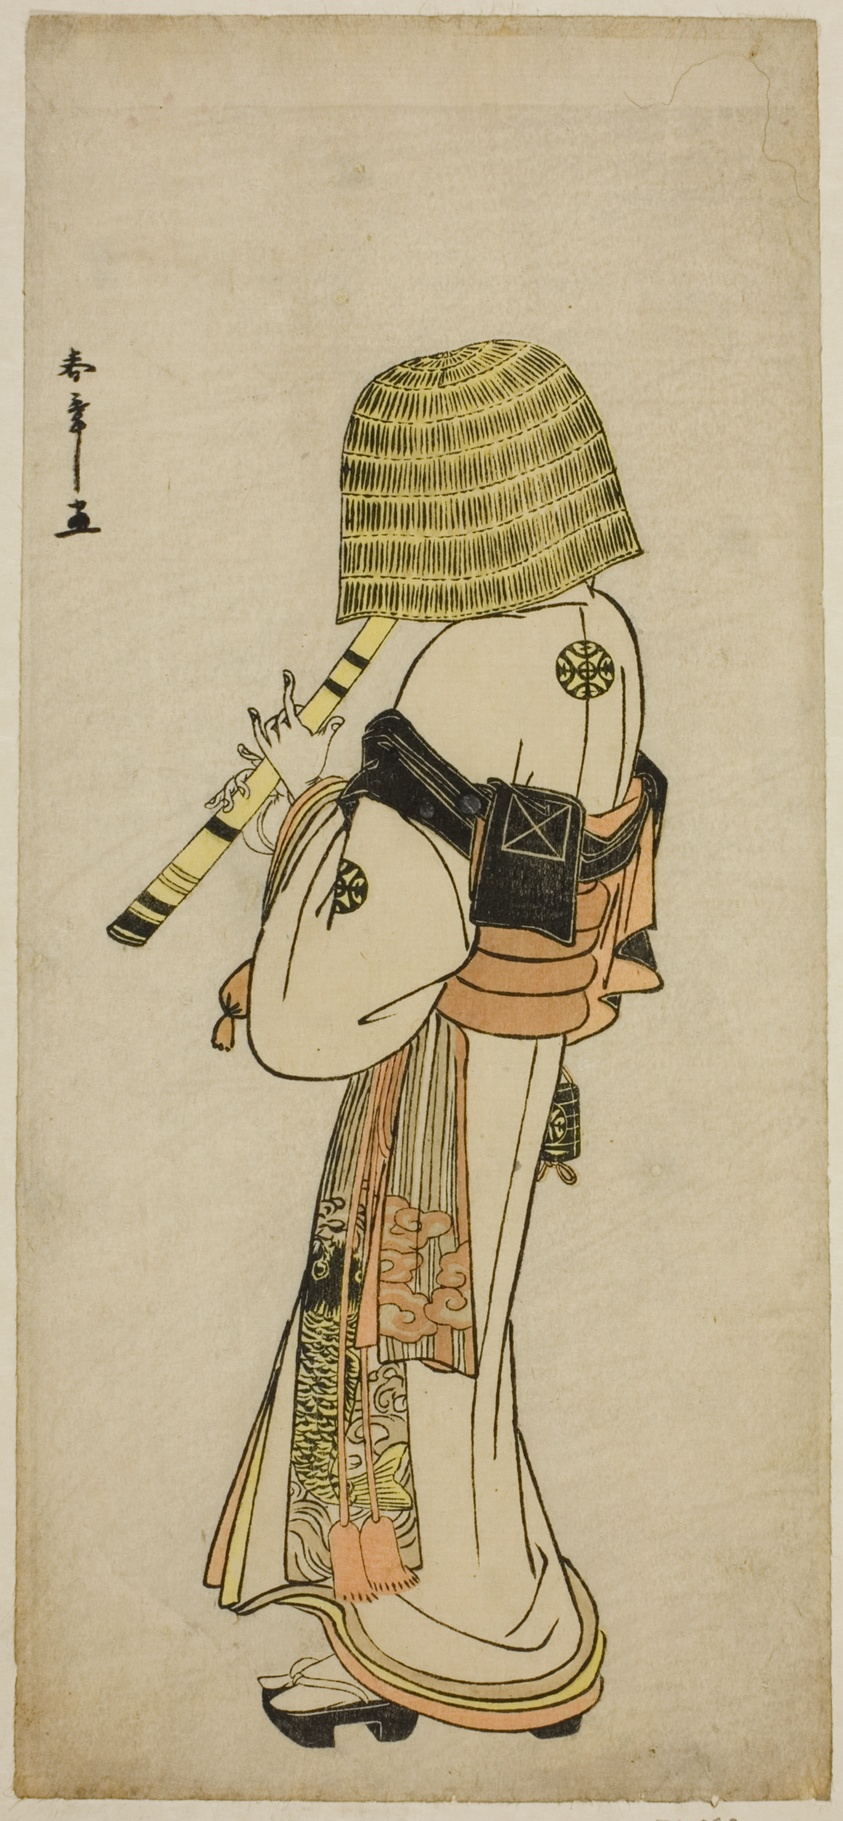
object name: Print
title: The Actor Nakamura Nakazo I as Kakogawa Honzo in Komuso Attire in the Play Kanadehon Chushingura, Performed at the Ichimura Theater in the Seventh Month, 1783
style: Japanese (culture or style)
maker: Katsukawa Shunsho 勝川 春章; Japanese, 1726-1792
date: c. 1783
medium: Color woodblock print; hosoban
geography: Japan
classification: woodblock print; print; asian art